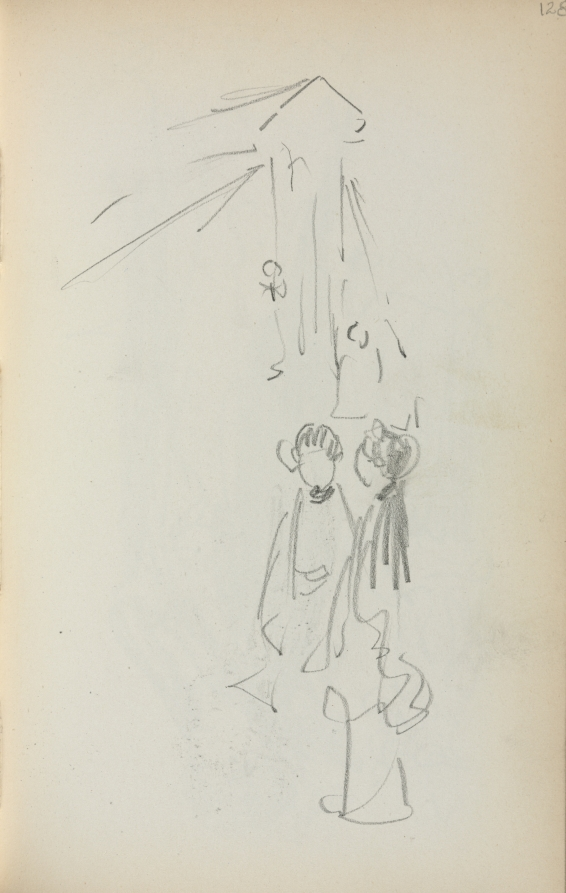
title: Italian Sketchbook: Figures (page 128)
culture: America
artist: Maurice Prendergast (American, born Newfoundland [now Canada], 1858–1924)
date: 1898–1899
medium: pencil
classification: Bound Volume